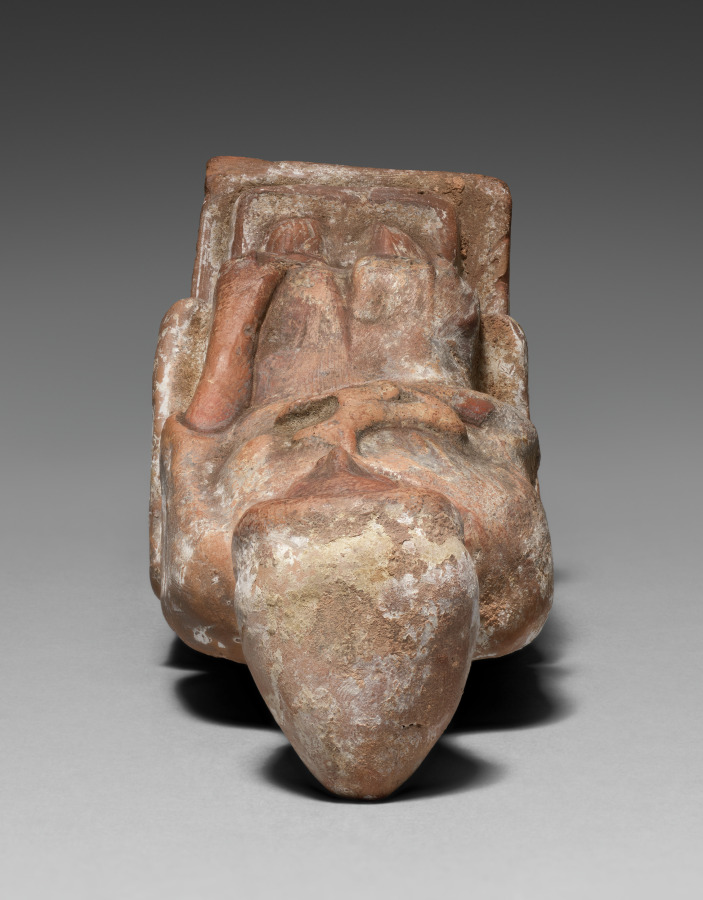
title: Archaic Figurine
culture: Greece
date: 500s BCE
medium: terracotta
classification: Sculpture